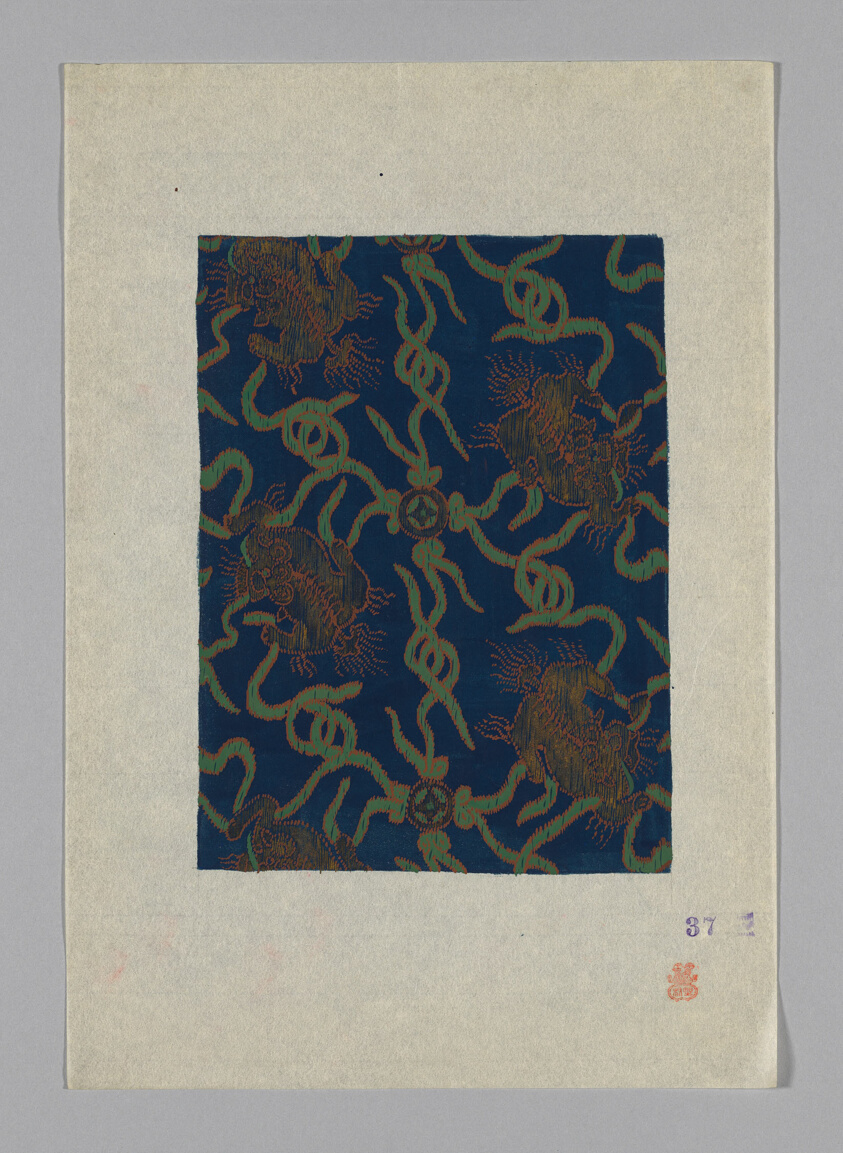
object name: Drawing and Watercolor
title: Design on Paper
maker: Japan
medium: Paper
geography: Japan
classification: textile; accessory - paper design; paper; watercolor